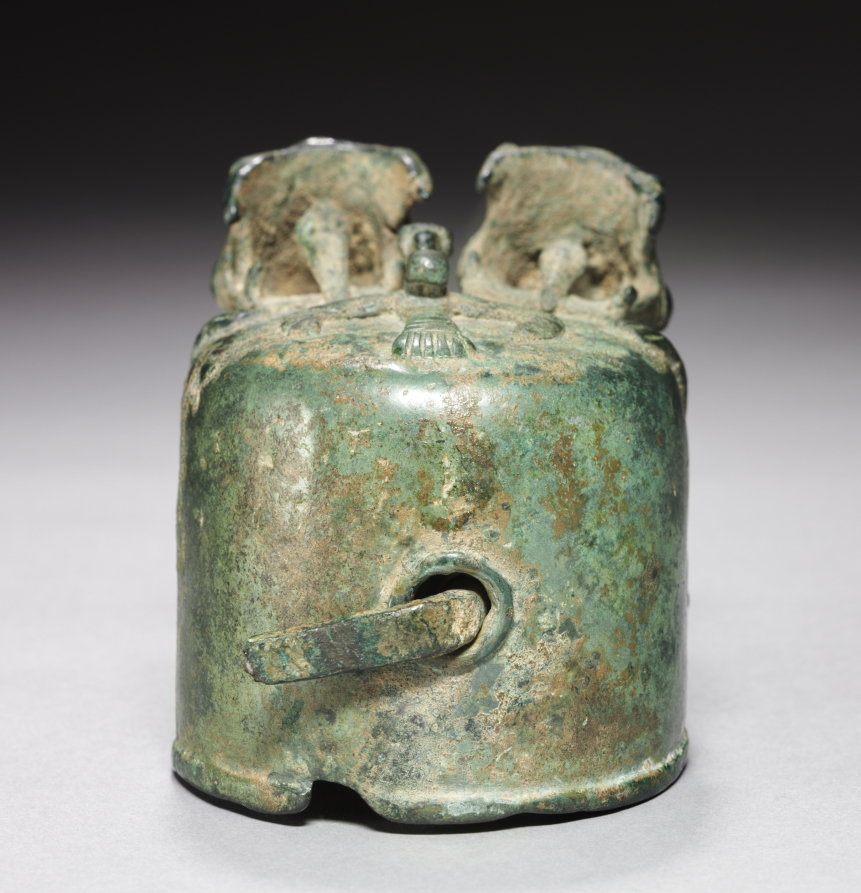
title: Axel Shaft Cup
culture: Iran, Luristan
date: c. 800–700 BCE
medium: bronze, cast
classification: Metalwork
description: Luristan, on Iran's western frontier, and Markik and Amlash in the north were sites of flourishing civilizations. However, since Luristan left little in the way of written records, all that we know about it has been guessed from their works of art. One of the ancient centers of the horse-breeding industry, Luristan is best known for its bronze objects, many of them horse or chariot trappings. Luristan supplied the Assyrian Empire not only with horses but also the hardware associated with them.